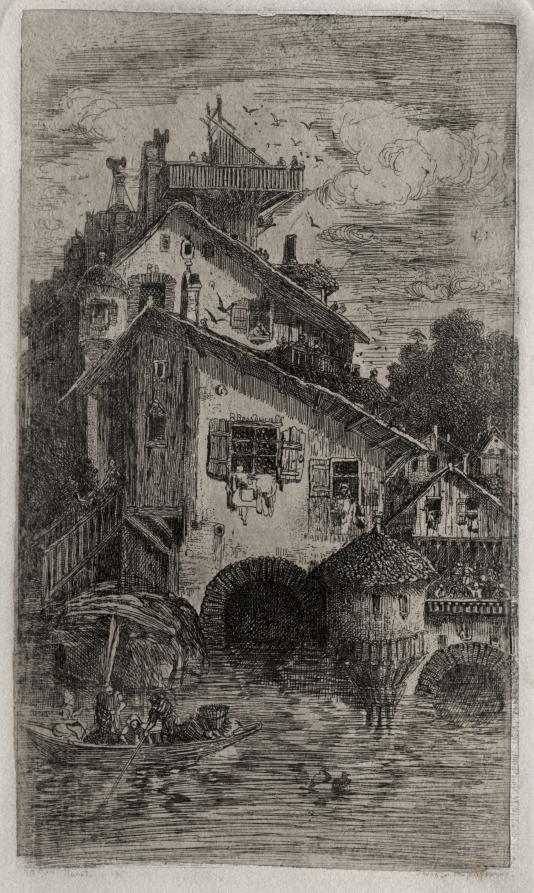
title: The Mill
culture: France, 19th century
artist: Rodolphe Bresdin (French, 1822–1885)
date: 1866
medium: etching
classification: Print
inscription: lower left, printed: RB fecit Bordeaux 1866; lower right, printed: Bresdin imprimme; center in plate: RB (above small window, in image); center, in plate: R Bresdin 1866 (above large window, in image)